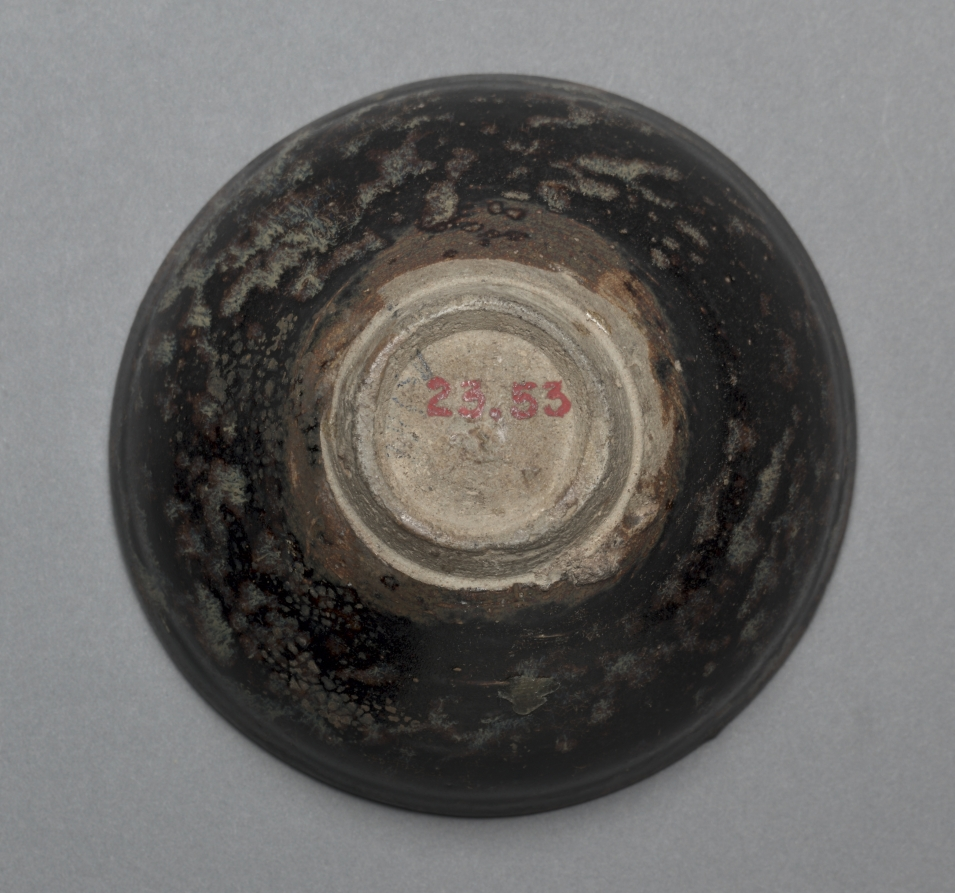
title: Tea Bowl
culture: China, Jiangxi province, Southern Song dynasty (1127-1279)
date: 1127–1279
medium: buff stoneware with iron brown glaze and paper-cut decoration, Jizhou ware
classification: Ceramic